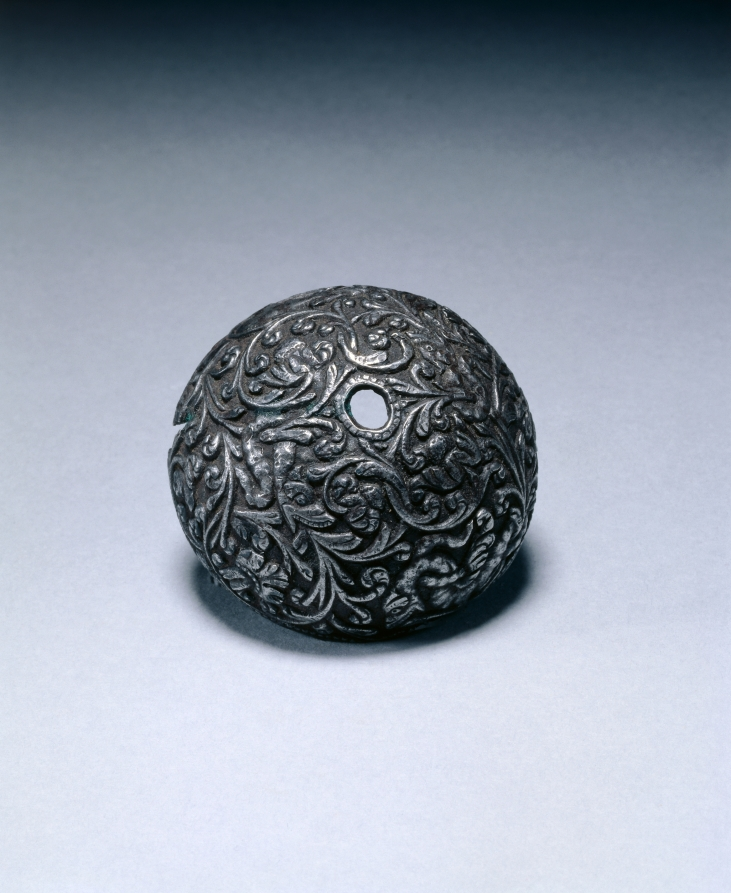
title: Butt-Cap from a Flintlock Pistol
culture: Italy, Brescia, 17th century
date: c. 1650–1660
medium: steel, chiseled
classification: Arms and Armor